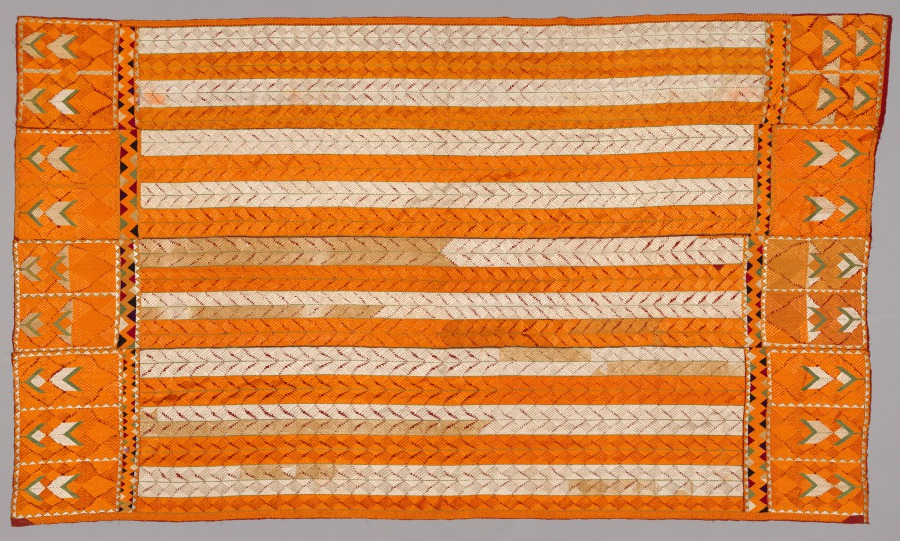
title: Shawl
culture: India, Punjab, 19th century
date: 1800s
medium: embroidery (phulkari); cotton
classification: Embroidery